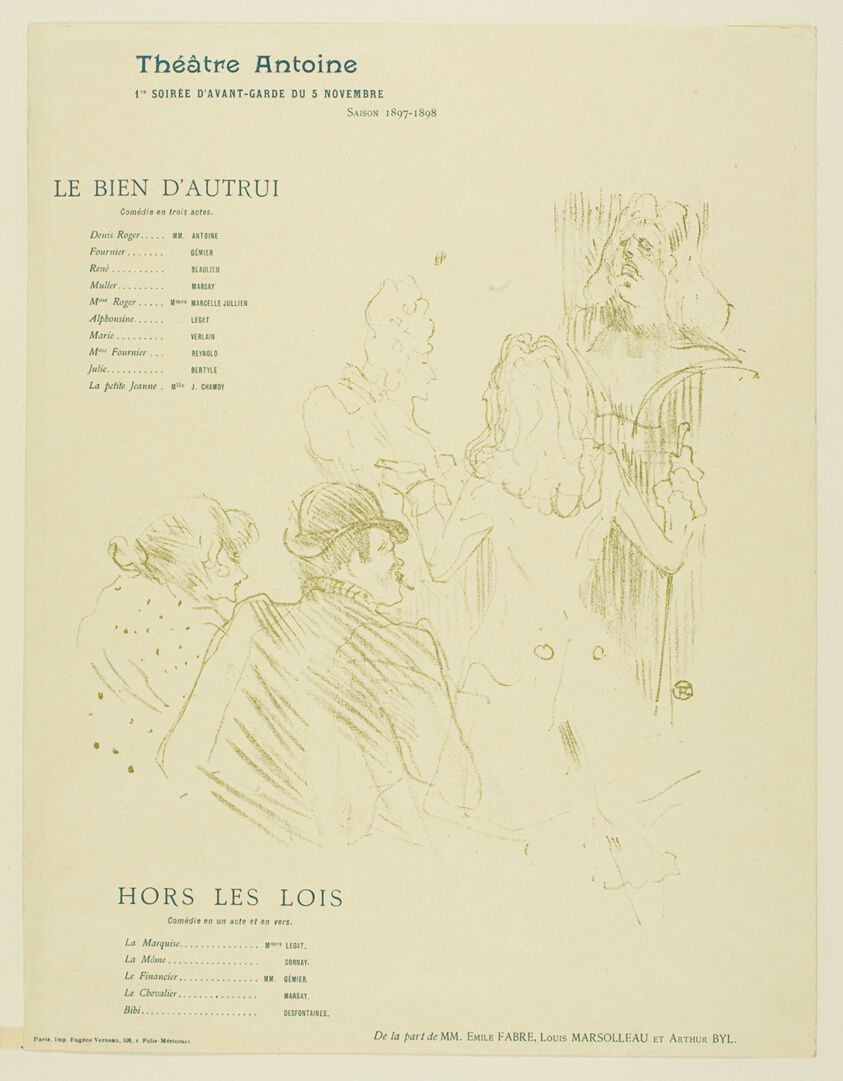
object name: Print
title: Homage to Molière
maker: Henri de Toulouse-Lautrec (French, 1864-1901)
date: 1897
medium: Color lithograph on cream wove paper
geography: France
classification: lithograph; print; prints and drawing